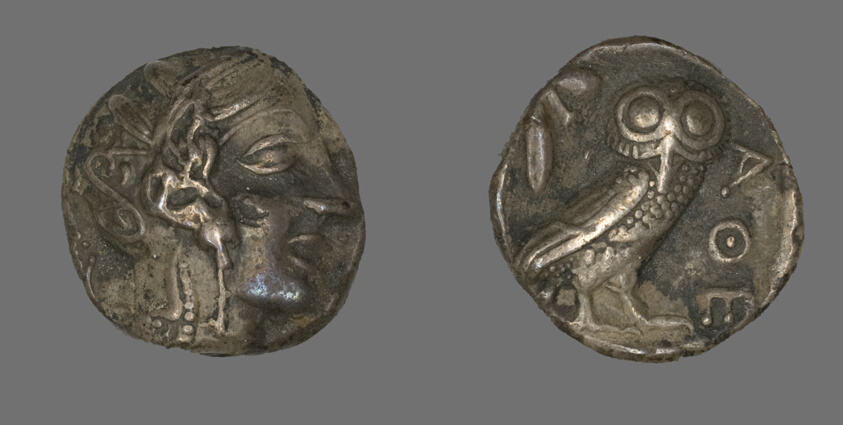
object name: Coin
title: Tetradrachm (Coin) Depicting the Goddess Athena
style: greek, ancient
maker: Greek, minted in Athens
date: 490-322 BCE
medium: Billon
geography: Athens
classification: coin; ancient art